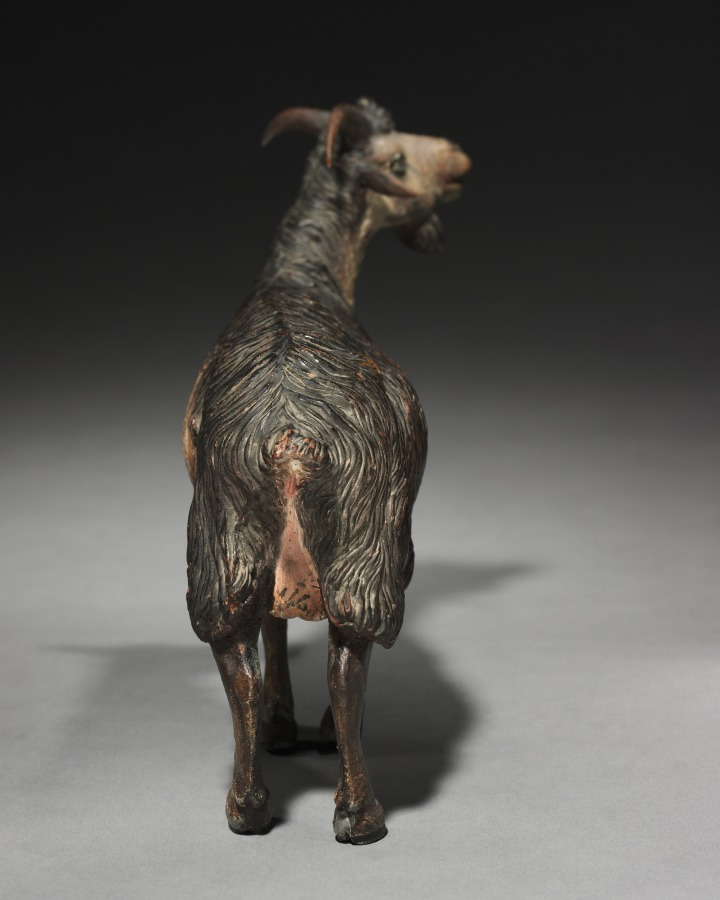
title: Figure from a Crèche: Standing Mountain Goat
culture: Italy, Naples, late 18th-early 19th century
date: 1780–1830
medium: painted wood and terracotta with various textiles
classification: Sculpture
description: The practice of creating scenes of the Nativity for the home dates from the early 1700s in Italy, where people began to set up doll-like figures of about a foot or less in height. The custom was particularly popular in Naples around 1800, where crèche scenes (crèche means cradle, or crib) included many figures, whose heads and hands of painted terracotta, stuffed cloth bodies, and clothing adapted from contemporary local costumes gave them an amazingly realistic character. Representations of the birth of Jesus can be traced to the first few centuries of Christianity. Both living creatures and sculptural depictions of them were used from early times. By the late middle ages it was customary to create life-size figures of wood or stone, naturalistically painted, to represent the characters who participated in the events of Jesus's early life. These sculptures were then arranged in scenes illustrating one or both of the most important of these events, the Adoration of the Shepherds and the Adoration of the Magi-the three kings from the East who came to pay homage to the Christ child. Used in churches, these large figures were especially popular in Italy, Central Europe, Spain, and Portugal. This Object in Focus presentation was organized by Henry Hawley, Curator of Renaissance and Later Decorative Arts and Sculpture.